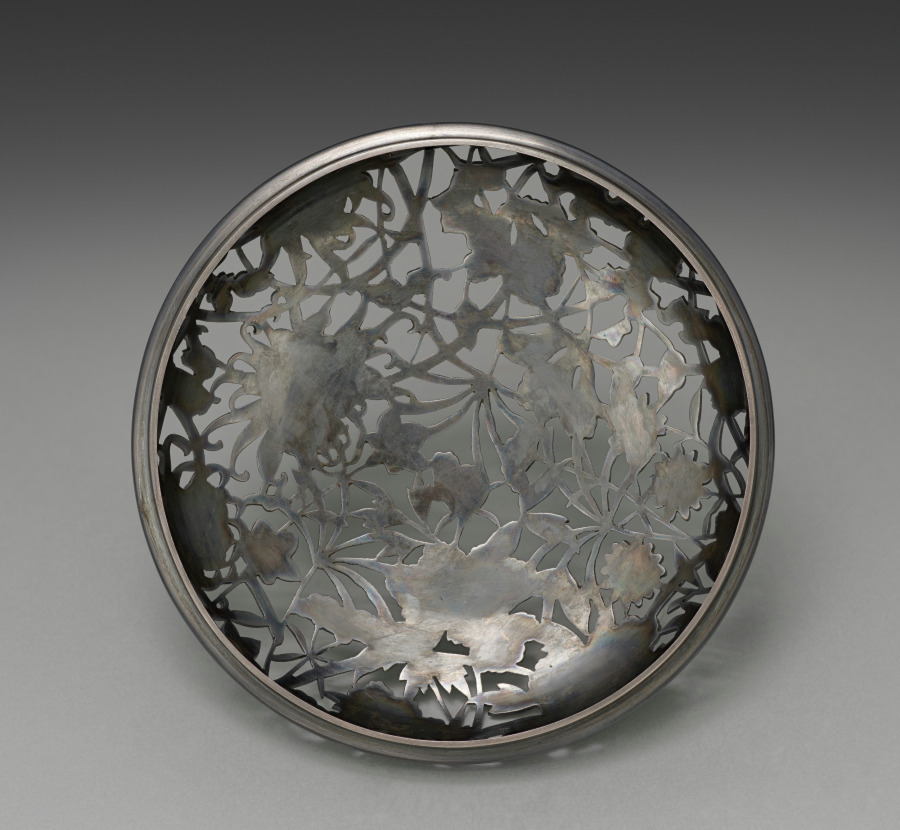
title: Lid for an Incense Burner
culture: Japan, Meiji period (1868–1912)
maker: Seifū Yohei III (Japanese, 1851–1914)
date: 1893–1914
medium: Floral openwork silver lid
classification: Ceramic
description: Yohei III made incense burners in a wide variety of designs and styles. The body and glaze of this one are taihakuji, or “great white porcelain,” an important early invention Yohei III devised in 1872 that involved the combination of a distinctive translucent, creamy glaze over an ivory-colored clay body. The burner has rounded, cabriole legs, resembling tiny table legs, attached to the exterior and the faintest decorative band around the bottom. It has a floral-patterned silver lid.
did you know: Lids were produced outside the studio by metalwork specialists.